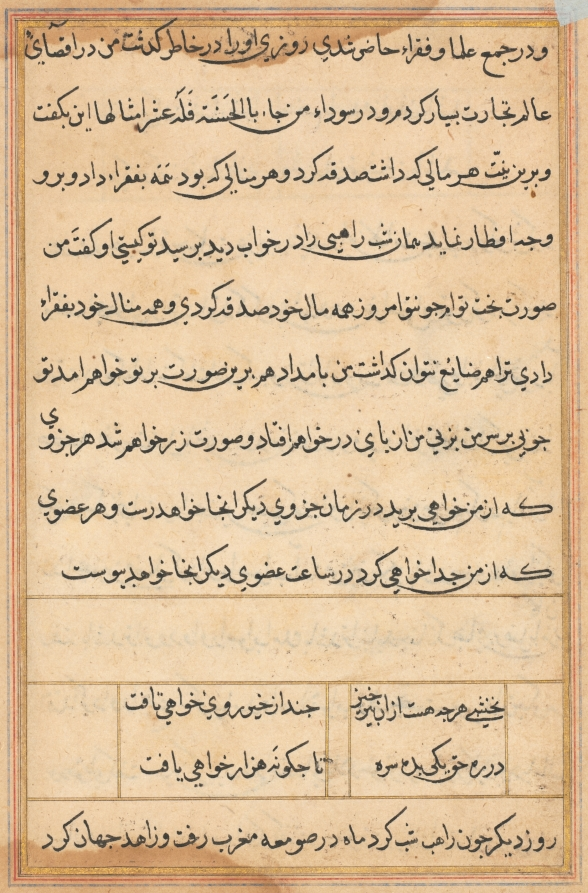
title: Page from Tales of a Parrot (Tuti-nama): text page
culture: Mughal India, court of Akbar (reigned 1556–1605)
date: c. 1560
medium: gum tempera, ink, and gold on paper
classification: Painting